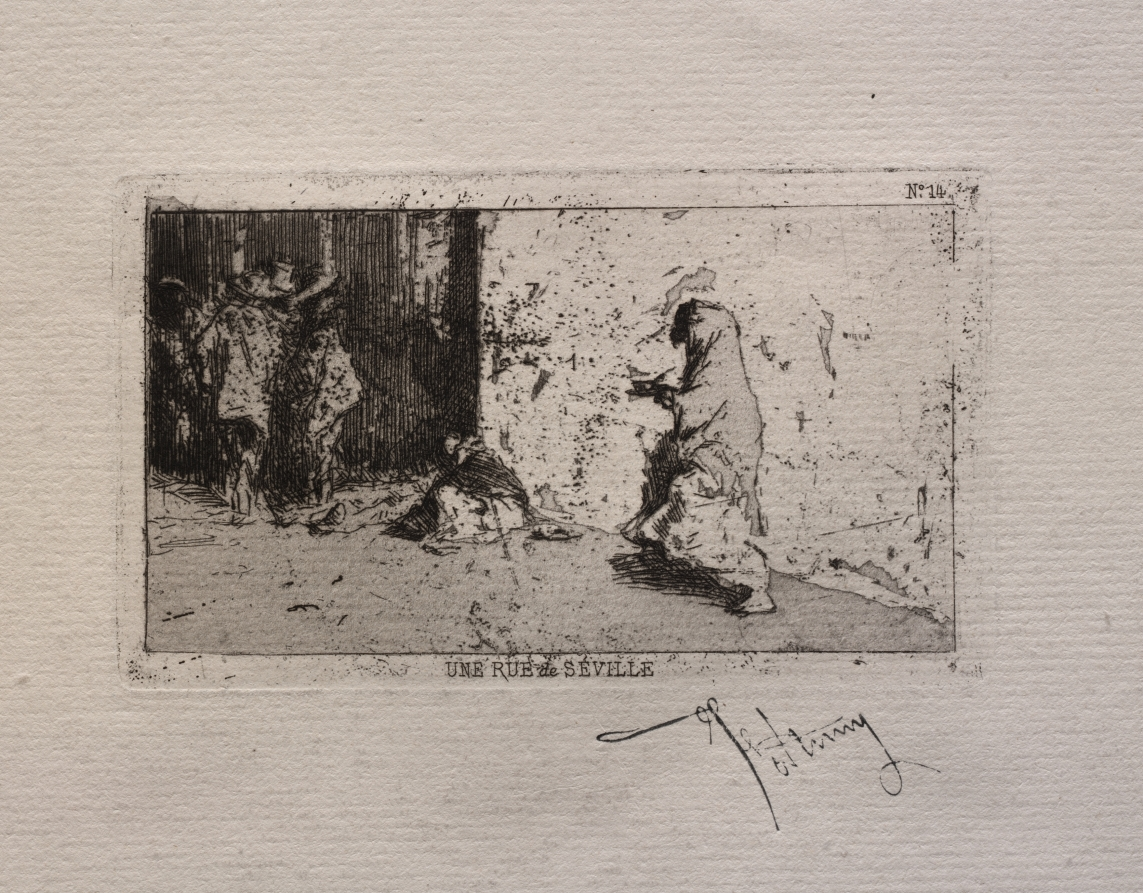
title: A Street in Seville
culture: Spain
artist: Mariano Fortuny (Spanish, 1838–1874)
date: c. 1861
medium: etching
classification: Print